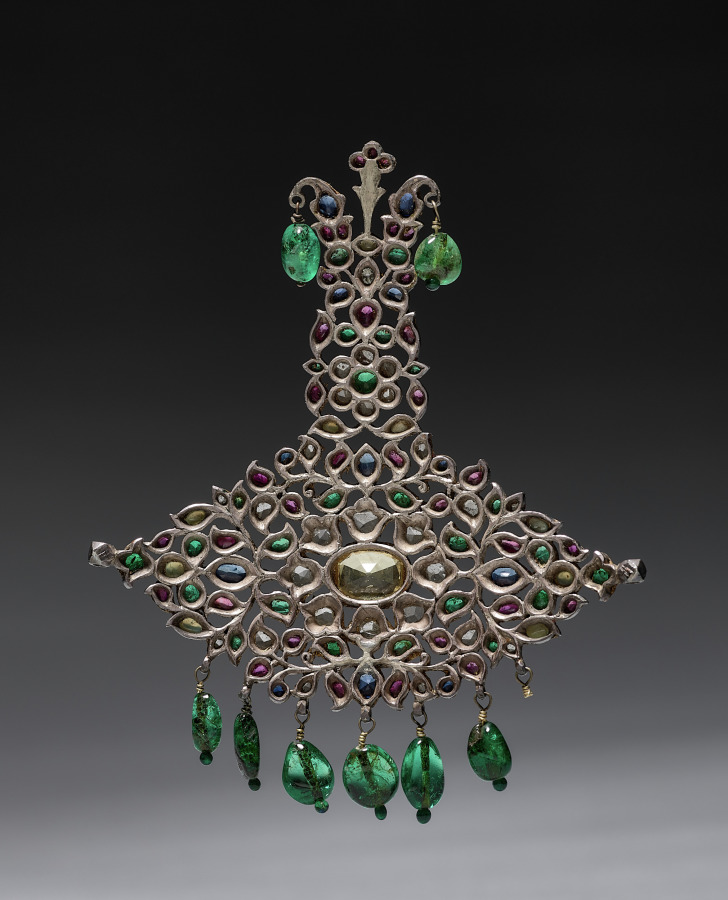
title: Turban Ornament (Sarpech)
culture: India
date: 1800s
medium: Gilt silver with diamonds, rubies, emeralds, topaz, blue sapphires, yellow sapphire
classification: Jewelry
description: This type of ornament would have been affixed to the front of a turban as an emblem of high noble status. The raised central element mimics the shape of an eagle feather or plume.